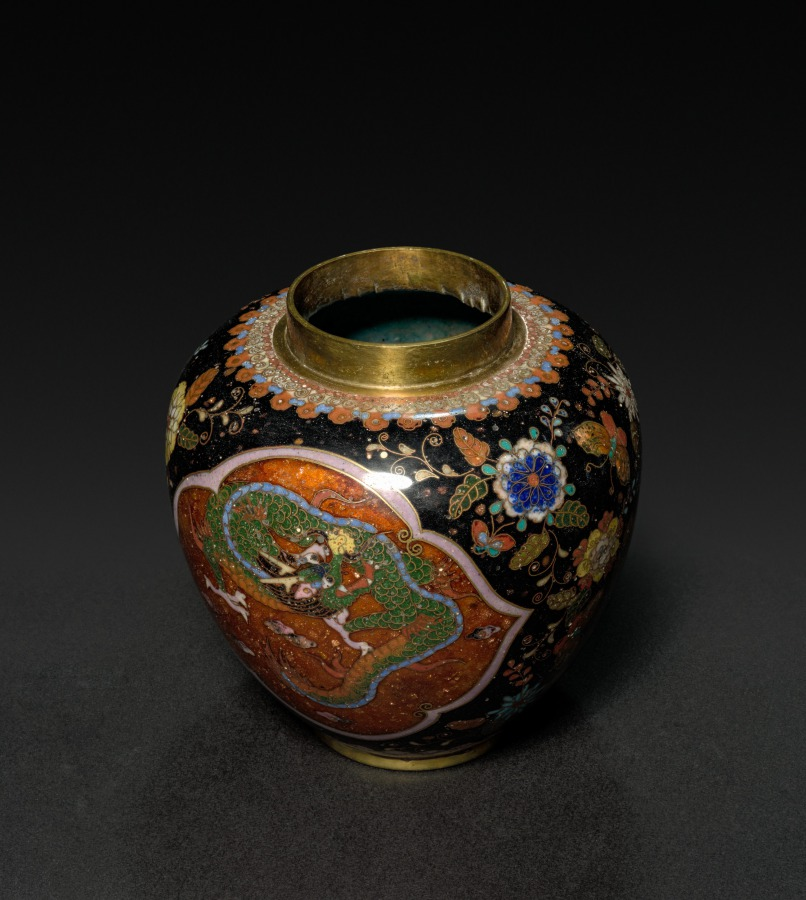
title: Ginger Jar with Phoenix and Dragon (base)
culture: Japan, Meiji period (1868–1912) to Taishō period (1912–26)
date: early 1900s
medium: cloisonne enamel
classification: Enamel